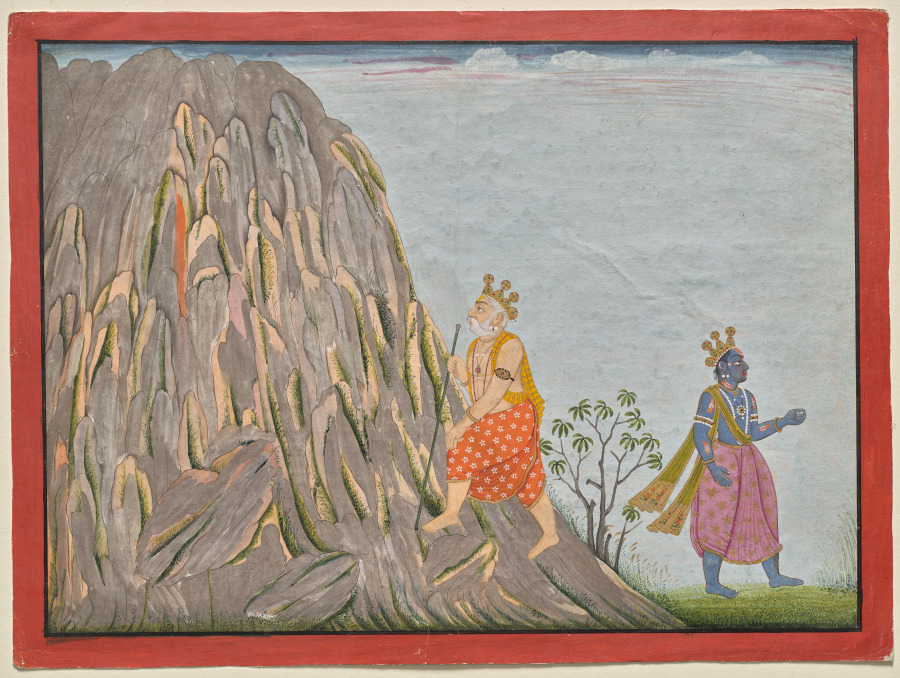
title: King Muchukunda Enters the Realm of Mount Gandhamadana to Attain Salvation, from the “Fifth Basohli Bhagavata Purana”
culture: Northern India, Pahari kingdoms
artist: attributed to Fattu (Indian)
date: c. 1760–70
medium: Gum tempera, ink, and gold on paper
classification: Painting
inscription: 52 dhiāi. 175 rājā mucakaṃda vara laike badari kadāri nū gae tā ku[la] yavāni matharā nū āye yudha karike.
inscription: chitra 139, adhyāya 52. śrī śruka uvācha. itthaṃ sonugṛhītoṃga kṛṣṇenekshvākunandanaḥ. taṃ parikramya saṃnamya niṣcakāma guhāmukhāt. sa vīkśya kśullakānmatryānpaśrunvīrudvanaspatīn. matvā kaliyugaṃ prāptaṃ jagām diśamuttarāṃ. tapaḥ śraddhāyuto dhīro niḥsaṃgo muktasaṃśayaḥ. samādhāya manaḥ kṛṣṇe prāviśādgaṃdhamādanam. vadaryā śramamāsādya naranārāyaṇālayaṃ. sarvadvaṃdvasahaḥ śāṃtasyapasārādhayaddhariṃ. iti śrī bhāgavate mahāpurāṇe daśama skaṃdhe uttarārdhe mucakuṃdoddharaḥ. 152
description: According to Hindu mythology, Muchukunda, the man dressed in saffron, fell asleep in a cave and slept for thousands of years. When he finally woke up, Krishna appeared and advised him to perform penance to cleanse the accumulated sins and attain liberation. He went to Mount Gandhamadana, on India’s east coast, to practice atonement.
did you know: The painting was turned horizontally, suggested by the upside down inscription on the verso